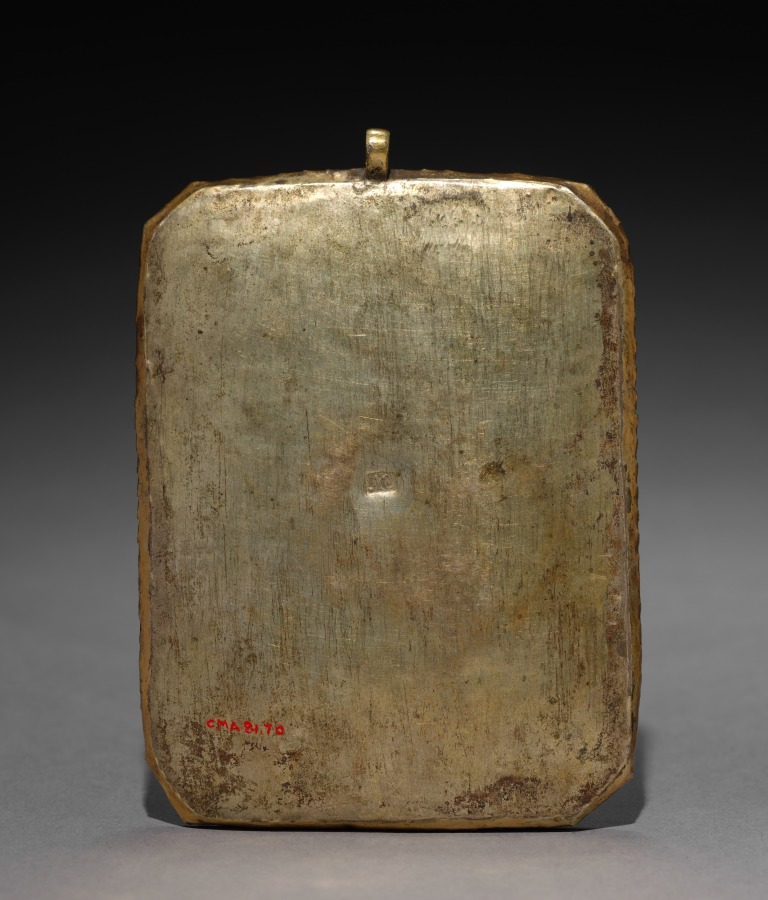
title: Icon of Saints Boris and Gleb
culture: Russia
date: 1700s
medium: enamel on copper, mounted in silver gilt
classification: Enamel